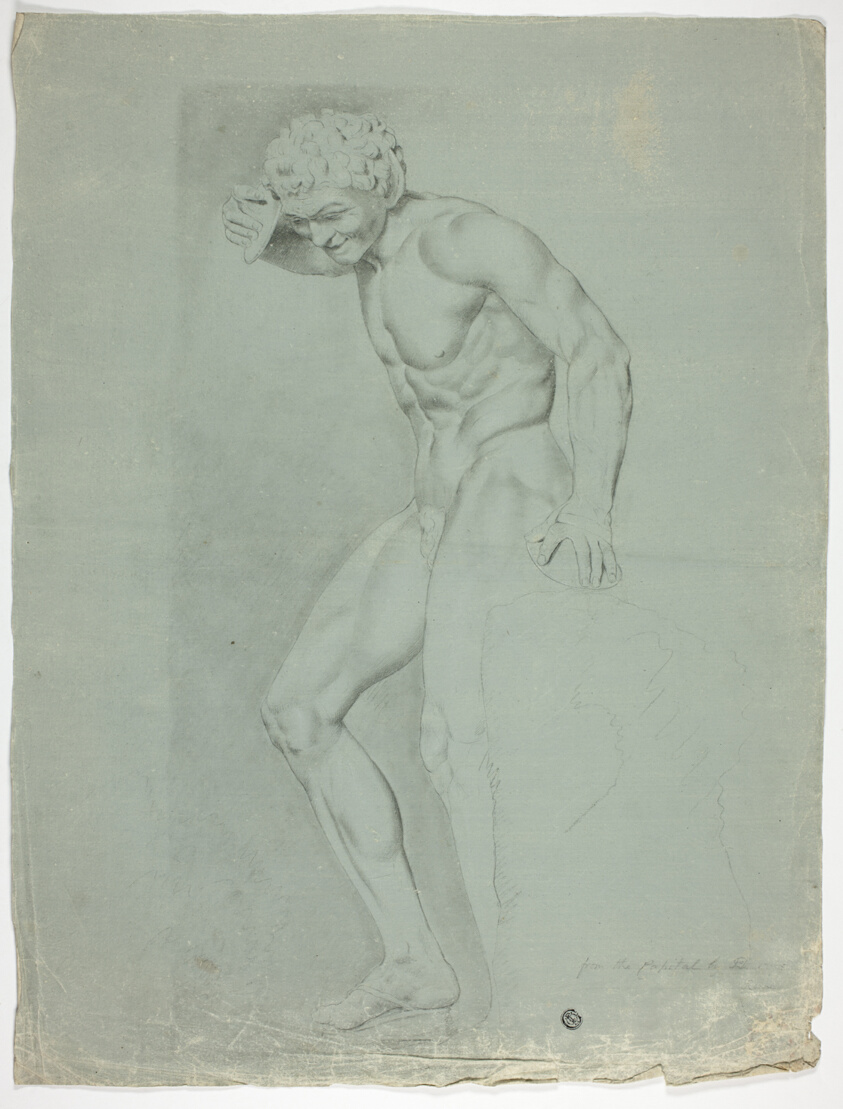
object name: Drawing and Watercolor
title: Antique Statue of Standing Faun with Cymbals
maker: John Downman (English, 1750-1824)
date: 1775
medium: Charcoal with stumping, heightened with traces of white chalk, on ivory wove paper prepared with a pale blue ground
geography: England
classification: chalk; drawings (visual works); prints and drawing